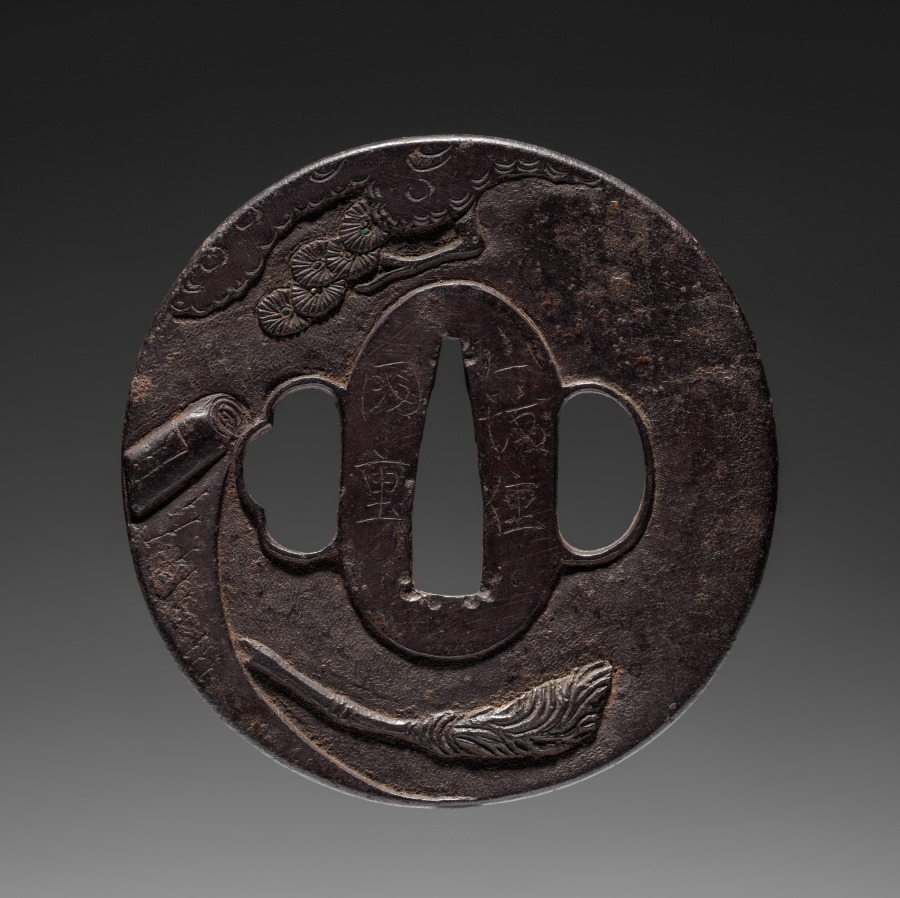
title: Sword Guard (Tsuba) with Hanshan and Shide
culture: Japan, possibly Edo period (1615-1868)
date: c. 1615–1868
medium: iron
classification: Arms and Armor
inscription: signed: 山城住國重